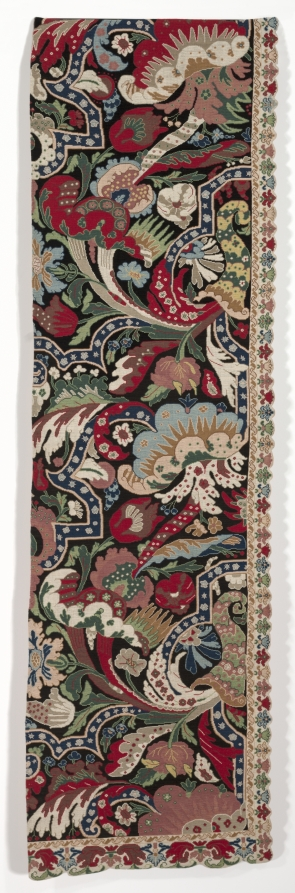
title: Needlework Bed Hanging in the Bizarre style (right half)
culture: France, 18th century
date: 1710–20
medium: needlework, tent and cross stitch embroidery on canvas; silk, wool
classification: Embroidery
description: This panel is one of a pair that would have hung originally around a bed post as part of a full set of hangings on a bedstead in the early 1700's. Elaborate textile hangings were a conspicuous display of wealth since many ladies received their friends within their bedchamber. A full set enveloped the entire bedstead and, when closed, helped retain warmth long after the fire had gone out. This particular pair of panels is remarkable in that they represent many hours of highly skilled needlework. Their design is known as a "bizarre" pattern, which mimicked woven silks of the same era that were asymmetrical, boldly stylized adaptations of Asian fabrics that were coming into the European market from the trading routes at the time.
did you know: The design of this needlework panel is known as a "bizarre" pattern.